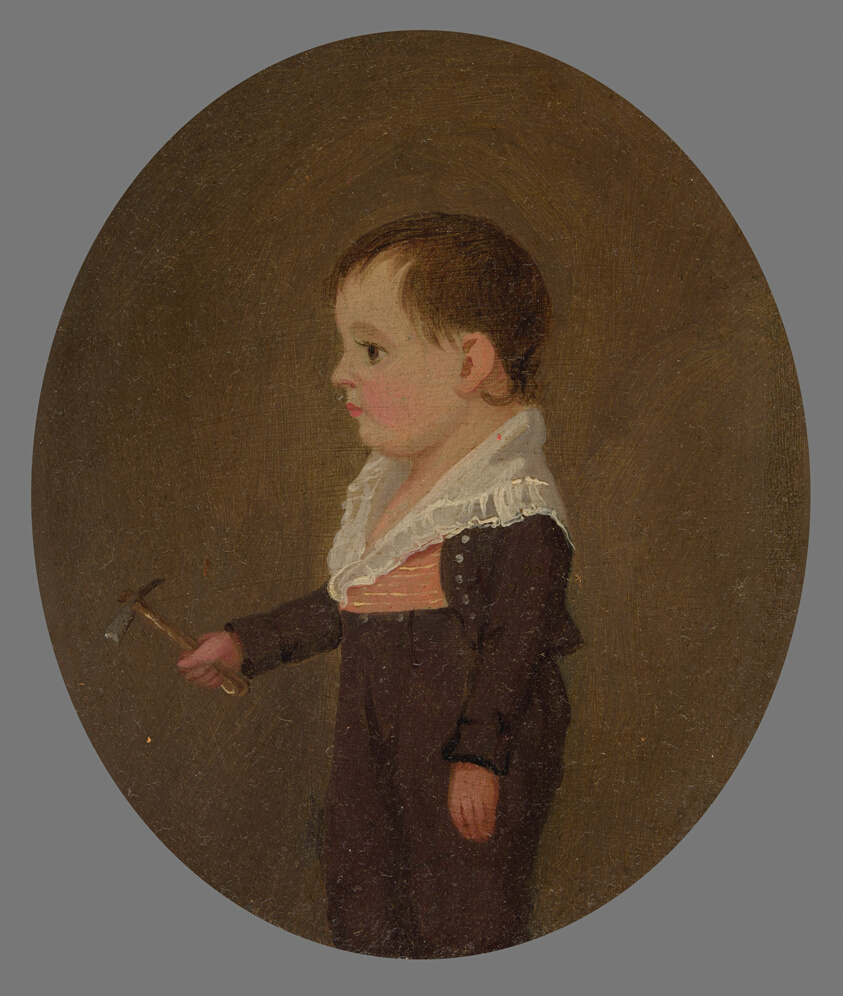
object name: Painting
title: Master Schaum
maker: Jacob Eichholtz (American, 1776–1842)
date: 1808–10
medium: Oil on yellow poplar panel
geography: Lancaster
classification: painting; american arts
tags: fashion, people, portraits